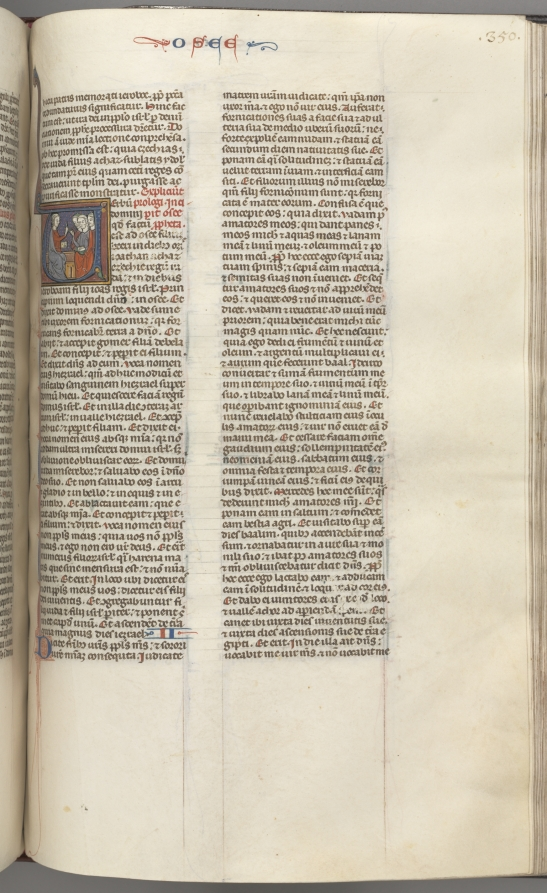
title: Fol. 350r, Hosea, historiated initial V, Hosea preaching to three men.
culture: Southern France, Toulouse(?), 13th century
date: c. 1275–1300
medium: ink, tempera and gold on vellum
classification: Bound Volume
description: Biblical manuscripts were highly prized and important possessions of churches, monasteries, cathedral schools, and universities throughout medieval Europe. The biblical texts were known as the vulgate, the translations made by Saint Jerome in the fourth century from Hebrew and Greek into Latin, which became the definitive and official Latin version of the Roman Church. In the 13th century, the bible was, for the first time, produced as a single volume with an officially sanctioned sequence to its books and chapters as illustrated by this example. The very extensive decoration of this bible is arranged hierarchically to indicate the relative importance of the various texts so that full or almost full-page initials mark the openings of the first prologue, Genesis, and the first Gospel; historiated initials mark the beginning of each book and illuminated initials mark the Prologues.